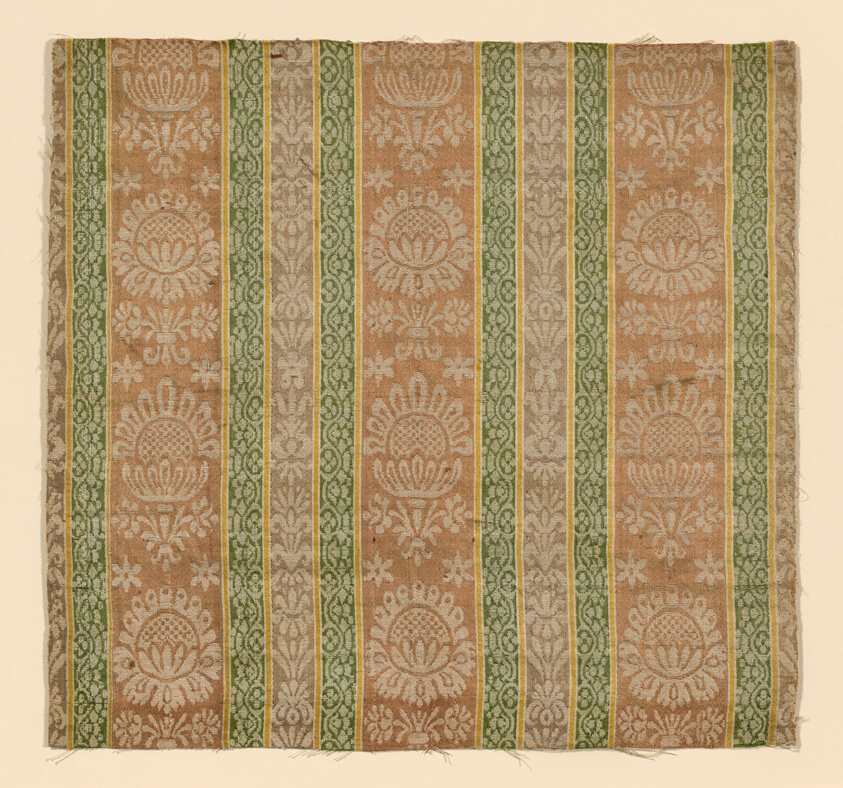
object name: Textile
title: Fragment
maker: Netherlands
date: 17th century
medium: Silk and linen, warp-stripe satin weave self-patterned by reversing of faces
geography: Netherlands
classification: textile; weaving